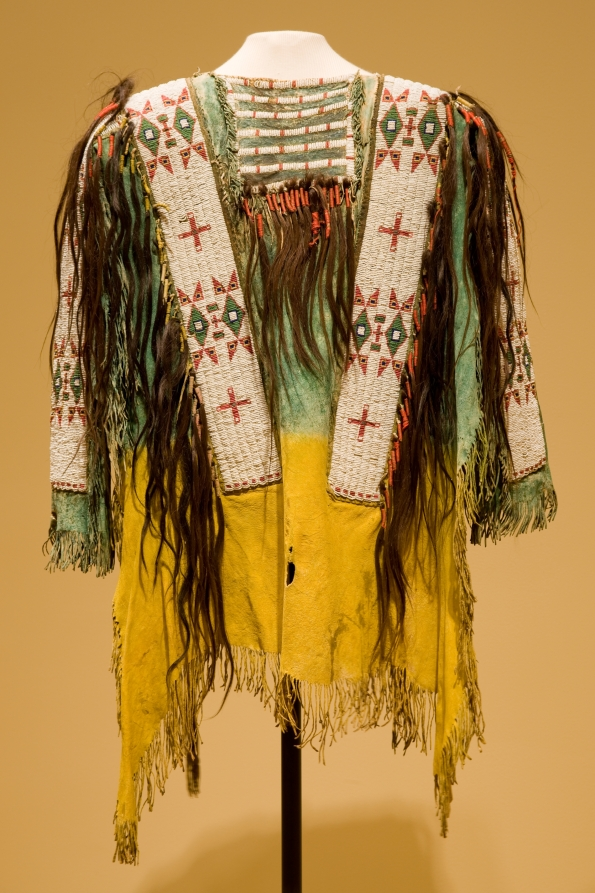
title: Hide Shirt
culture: America, Native North American, Central Plains, Lakota Sioux, 19th century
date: c. 1890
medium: hide, pigment, glass beads, human hair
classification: Textile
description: Traditionally, only Lakota (Sioux) head chiefs had the right to wear painted shirts, an honor they earned through sacrifice and bravery but lost by failing in their responsibilities. By the time this example was created, European Americans had confined the Lakota to reservations, and painted shirts had become the privilege of battle veterans rather than of active warriors. Family members probably donated the locks of hair, each representing a war exploit.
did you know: Only Lakota (Sioux) chiefs had the right to wear painted shirts, an honor they earned through bravery.